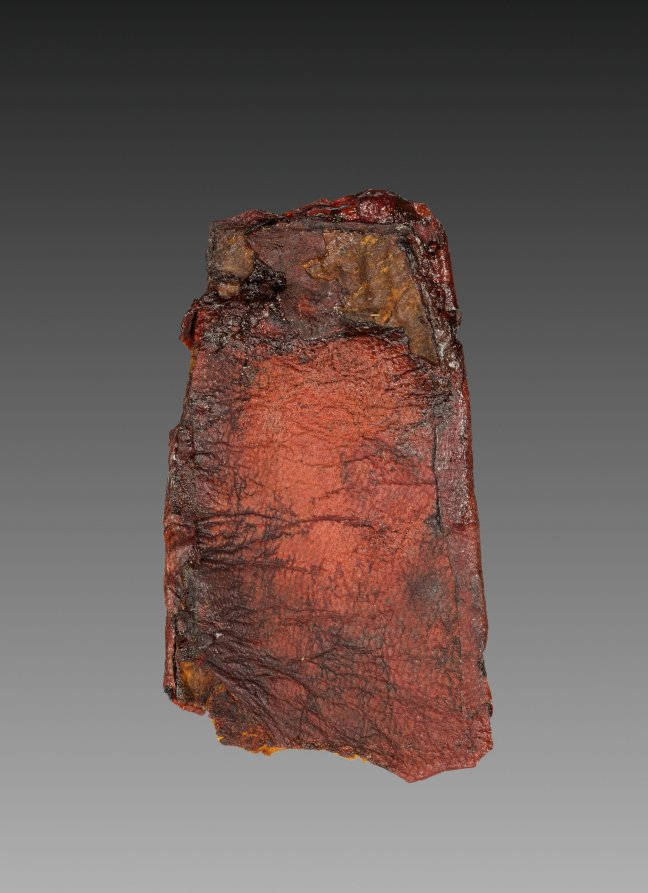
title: Tab from Mummy Band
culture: Egypt, Third Intermediate (1069–715 BCE), Dynasty 22, reign of Osorkon I (992–887 BCE)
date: 945–715 BCE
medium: stained leather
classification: Funerary Equipment